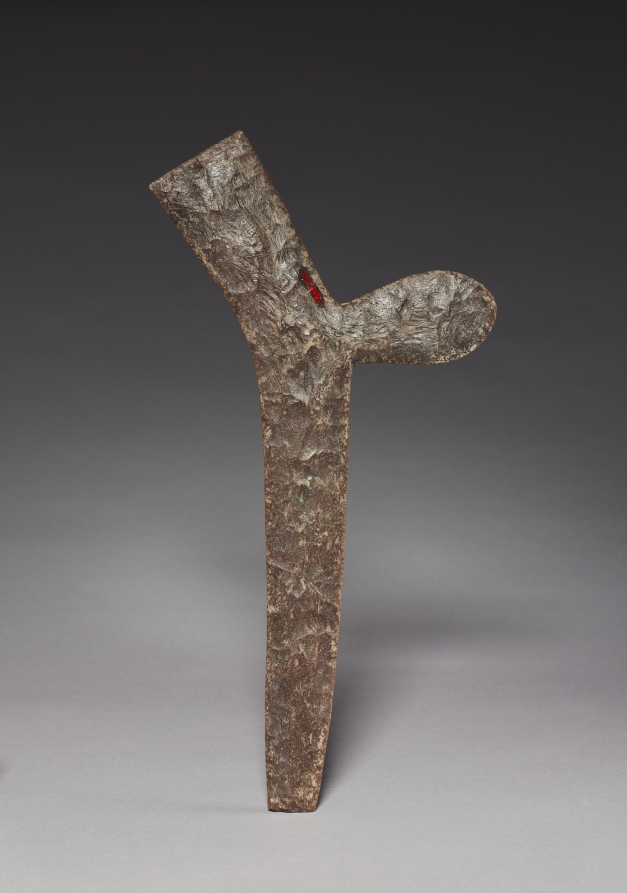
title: Axe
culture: Mexico or Central America, Maya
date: c. 250–900 CE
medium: chipped flint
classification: Implements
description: Axes with stone blades and wooden hafts were used to clear land for planting. This more fragile example, made entirely of chipped flint, is a ceremonial version probably used in rituals before it was deposited in a tomb or an offering. Late Classic Maya vase paintings make the ceremonial associations of axes clear. In these painted scenes, axe-wielding deities dance among skeletons and supernatural animals, or raise the axe to strike a sacrificial victim.